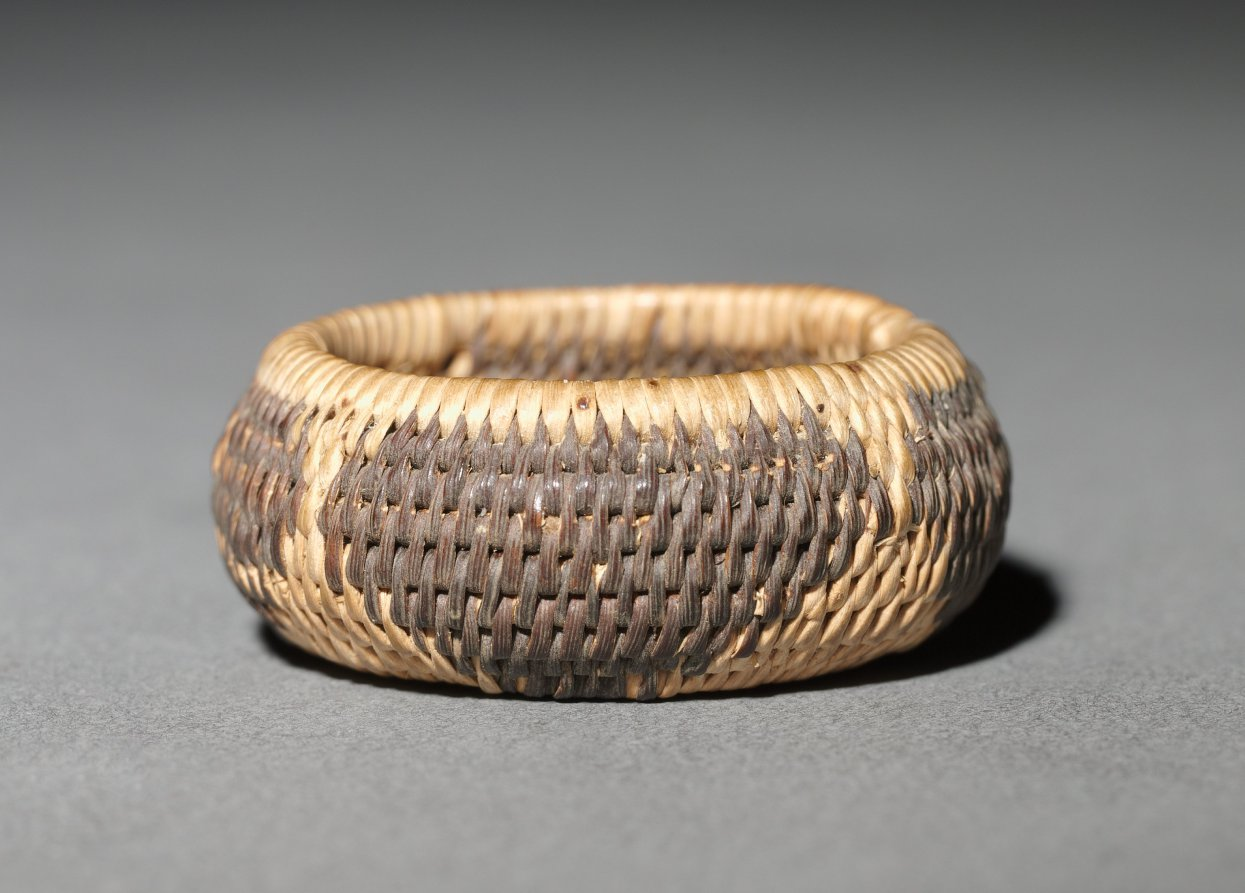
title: Miniature Basket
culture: America, Native North American, Southwest, Arizona, Akimel O'odham (Pima), Unassigned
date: before 1923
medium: plant fiber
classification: Basketry